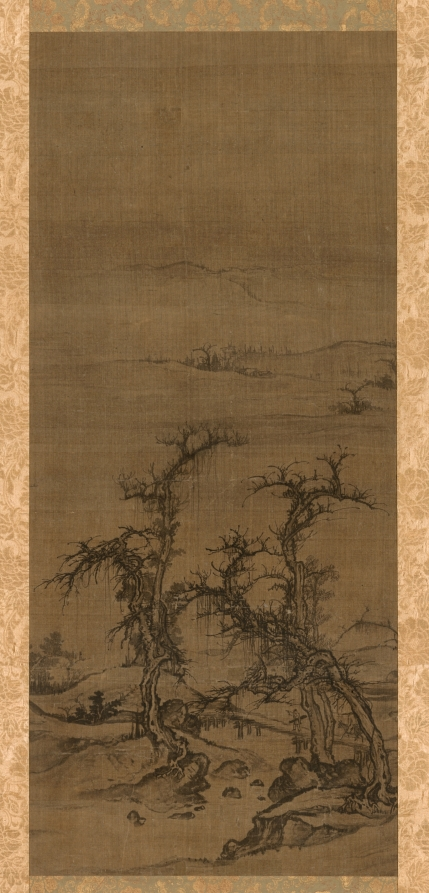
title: Carrying a Qin on a Visit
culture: China, Yuan dynasty (1271-1368)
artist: attributed to Luo Zhichuan (Chinese, active 1280s–1320s)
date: 1271–1368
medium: hanging scroll (now paneled), ink on silk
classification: Painting